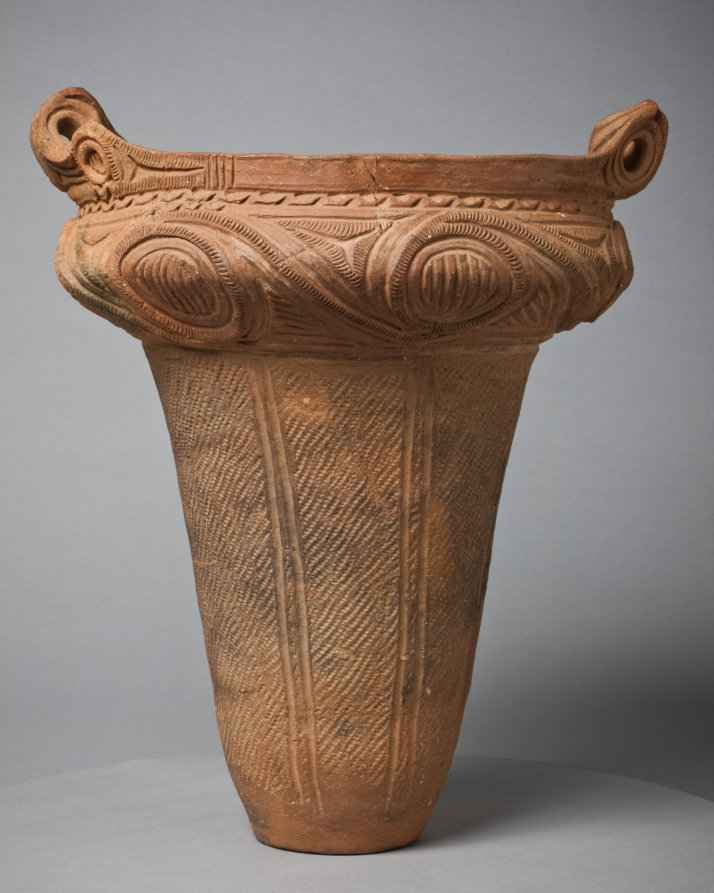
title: Urn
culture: Japan, Jōmon period (c. 10,500–300 BCE)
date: c. 2000 BCE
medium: earthenware, terracotta, impressed and incised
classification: Ceramic